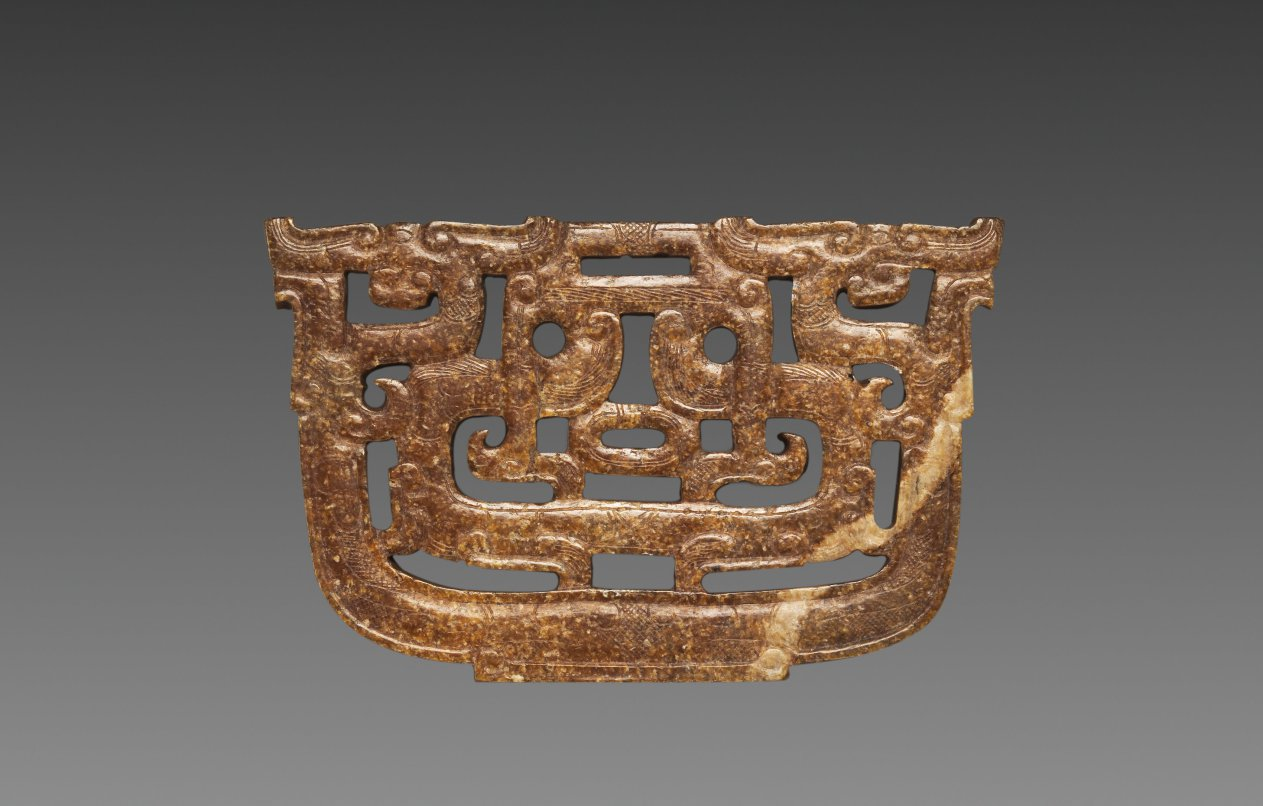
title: Plaque with Openwork Interlaced Dragons and Birds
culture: China, Warring States period (475–221 BCE)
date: 475–221 BCE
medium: jade (nephrite)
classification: Jade